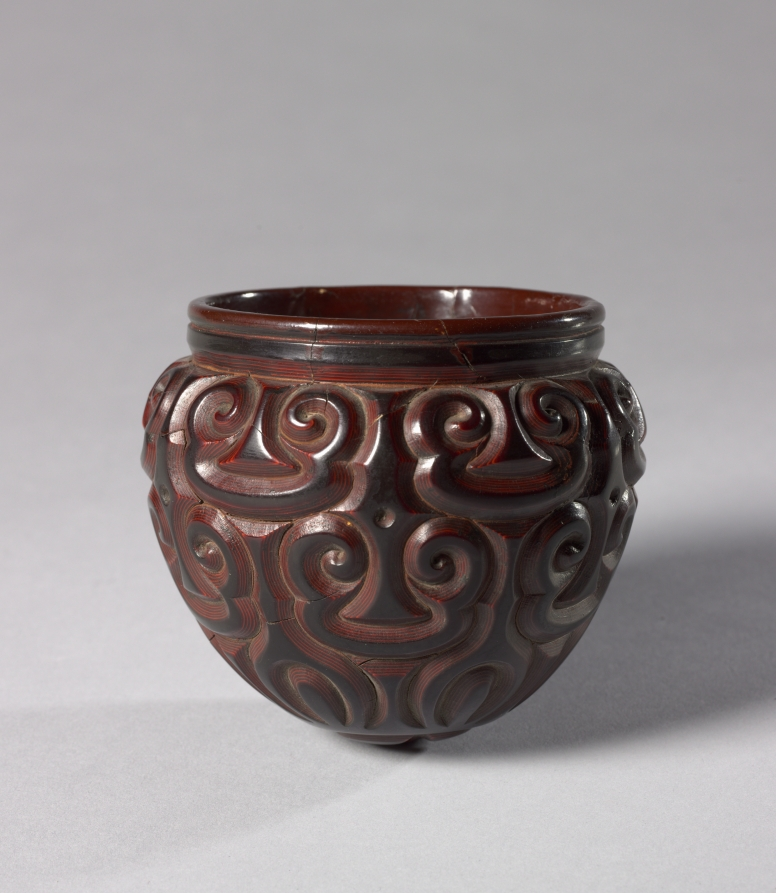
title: Tea Cup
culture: China, Ming dynasty (1368–1644)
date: early 1500s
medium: guri lacquer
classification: Lacquer